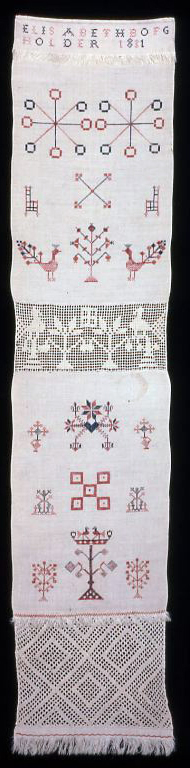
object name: Textile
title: Towel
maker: Elizabeth Bofgholder (American, active c. 1831); United States, Pennsylvania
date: 1831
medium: Linen, plain weaves; pieced; cut and drawn thread work embroidered with cotton and linen in overcast and darning stitches; pulled thread work with linen in loop stitches; embroidered with cotton in cross and darning stitches; warp fringe; tapes of linen, plain weave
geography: United States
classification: textile; needlework (visual works)